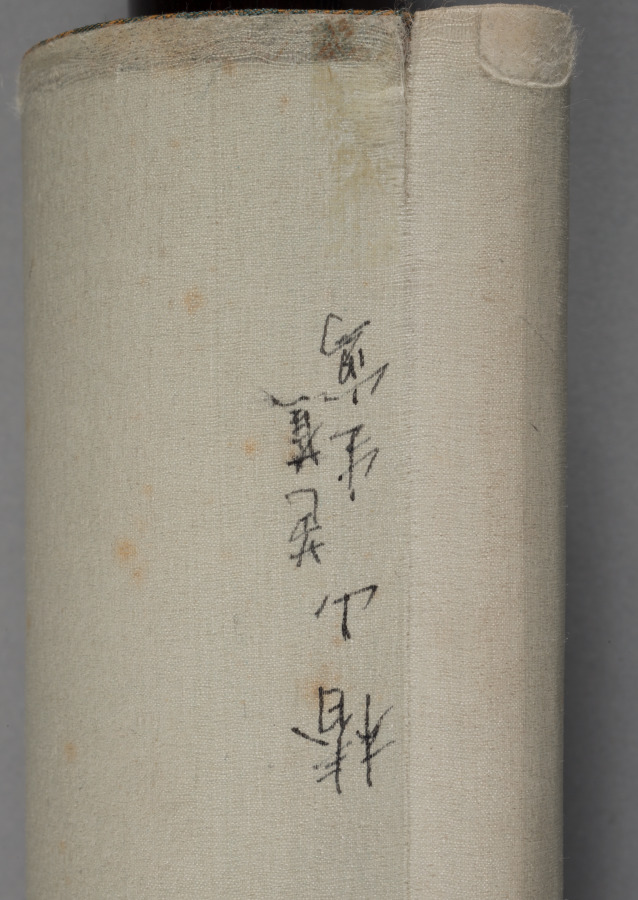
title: Banana Plant and Chrysanthemum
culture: Japan, Edo period (1615–1868)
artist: Tsubaki Chinzan (Japanese, 1801–1854)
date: c. 1820–54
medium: hanging scroll; ink and color on paper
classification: Painting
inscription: artist's inscription and two seals middle right side.